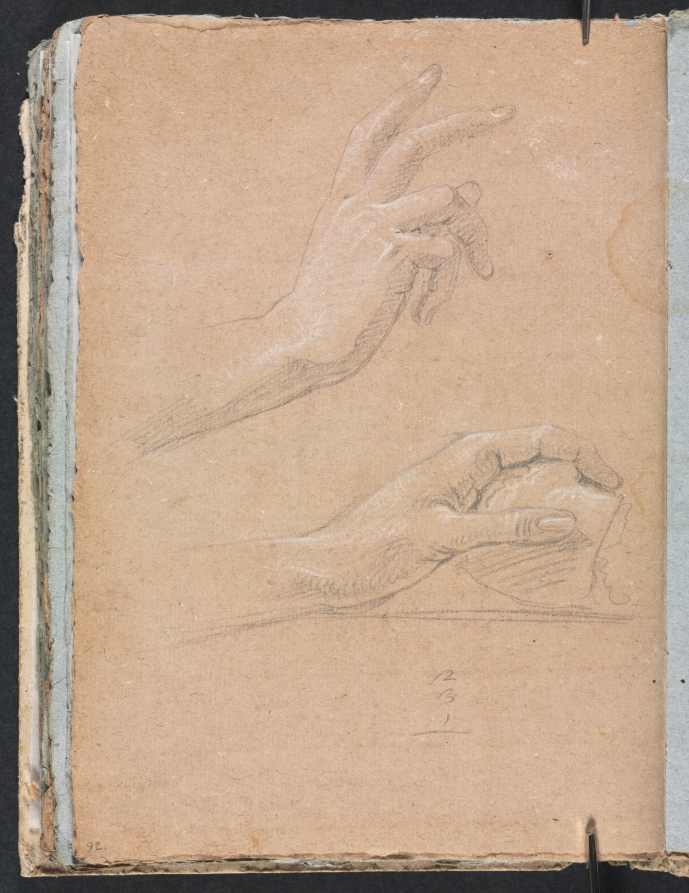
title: Verona Sketchbook: Hands (page 92)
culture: Italy, 18th century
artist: Francesco Lorenzi (Italian, 1723–1787)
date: 1760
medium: black chalk with white heightening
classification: Bound Volume